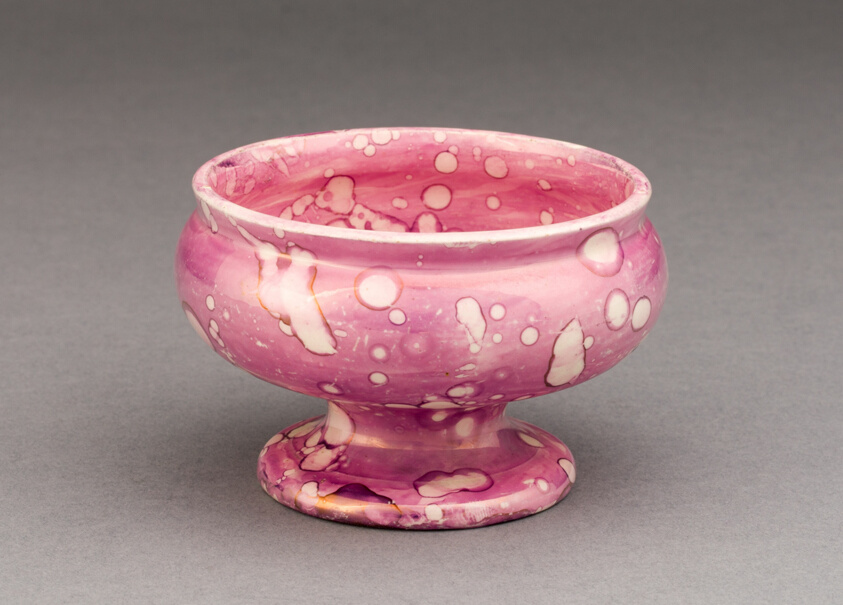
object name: Ceramics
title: Salt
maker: England, Sunderland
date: 1810/20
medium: Earthenware with purple lustre decoration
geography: Sunderland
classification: earthenware; ceramics; european decorative arts